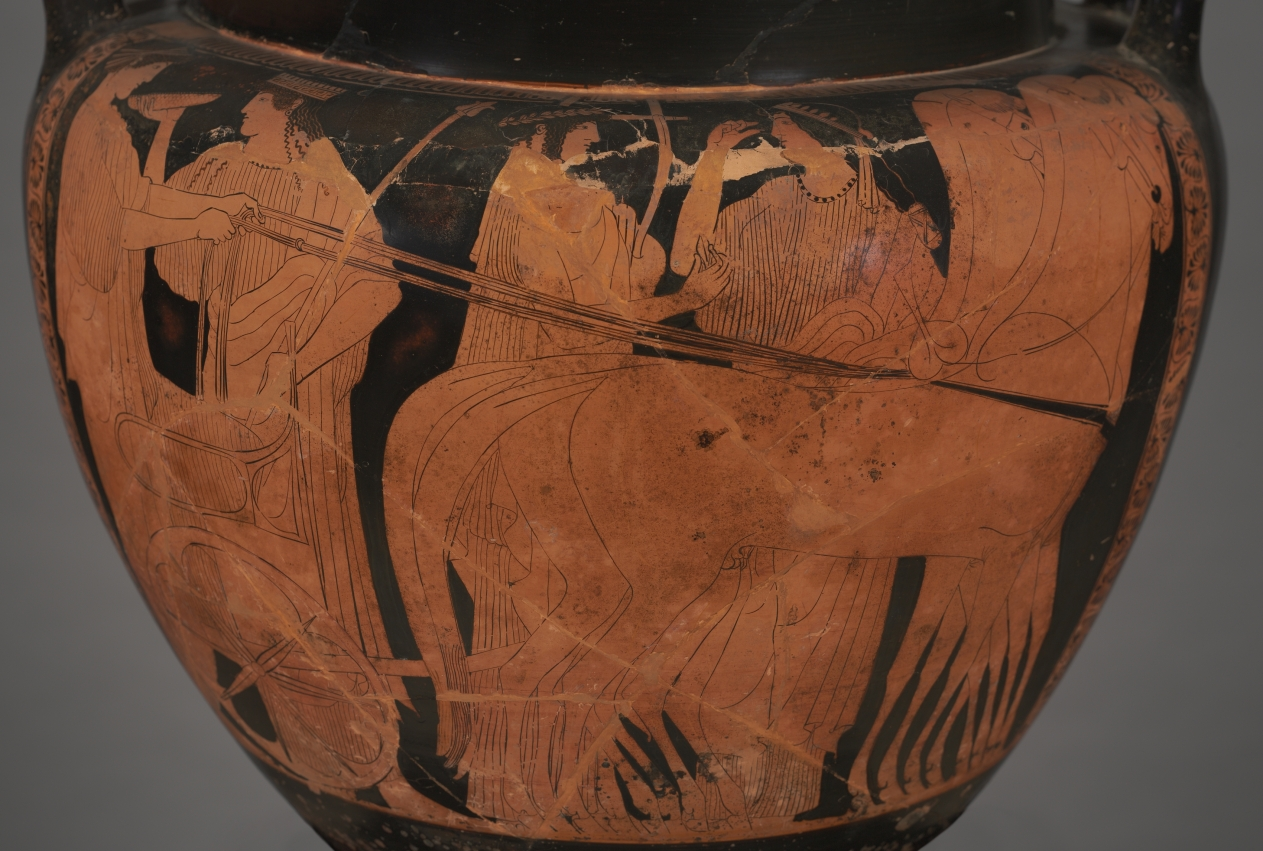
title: Red-Figure Column Krater (Mixing Vessel): Apollo and Goddesses with Chariot (A); Komos (Revel) (B)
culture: Greek, Attic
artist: attributed to Cleveland Painter (name vase; Greek, Attic, active c. 470–460 BCE)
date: c. 470–460 BCE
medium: ceramic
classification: Ceramic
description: Since this column-krater is the most important of 12 vases painted by a Greek artist whose name is unknown, the great English vase expert, Sir John D. Beazley, named him (or her) the Cleveland Painter, after our city. Other vases by the Cleveland Painter are now in New York, Vienna, Paris, and Copenhagen, as well as museums in Greece and Italy. The chariot scene on the main side of the vessel is a divine one, as indicated by the presence of Apollo, identified by his lyre and laurel wreath. With him are three goddesses, probably his sister Artemis (facing him), together with Hera (wearing a crown and holding a scepter and libation dish), and Hebe, the daughter of Zeus and Hera, on her way to meet her future husband, Herakles.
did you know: The revelers on this vessel dance to the music of the barbiton, a stringed instrument associated with leisure and luxury.